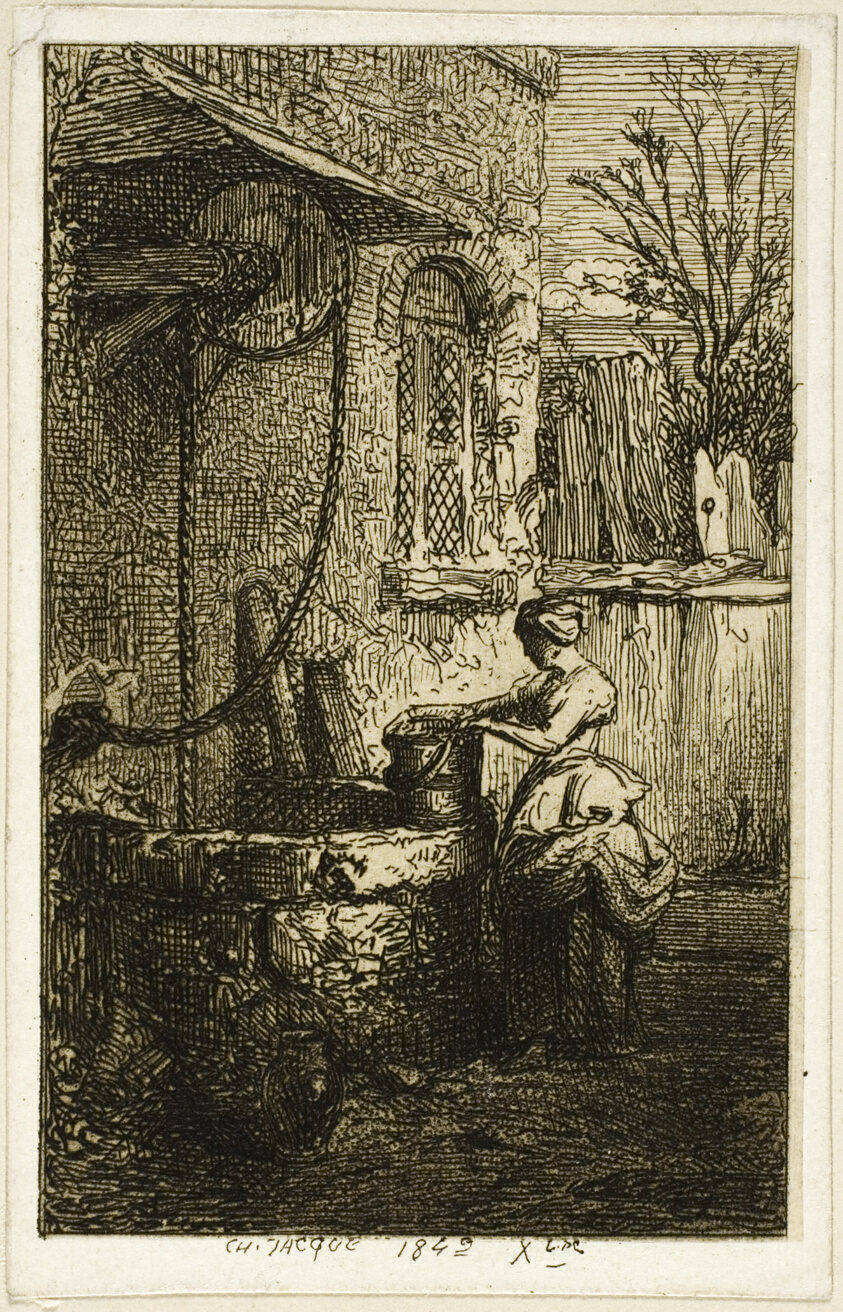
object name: Print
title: Woman at a Well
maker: Charles Émile Jacque (French, 1813-1894)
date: 1842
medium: Etching on ivory wove paper laid down on white wove paper, laid down on ivory wove card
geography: France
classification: etching; print; prints and drawing